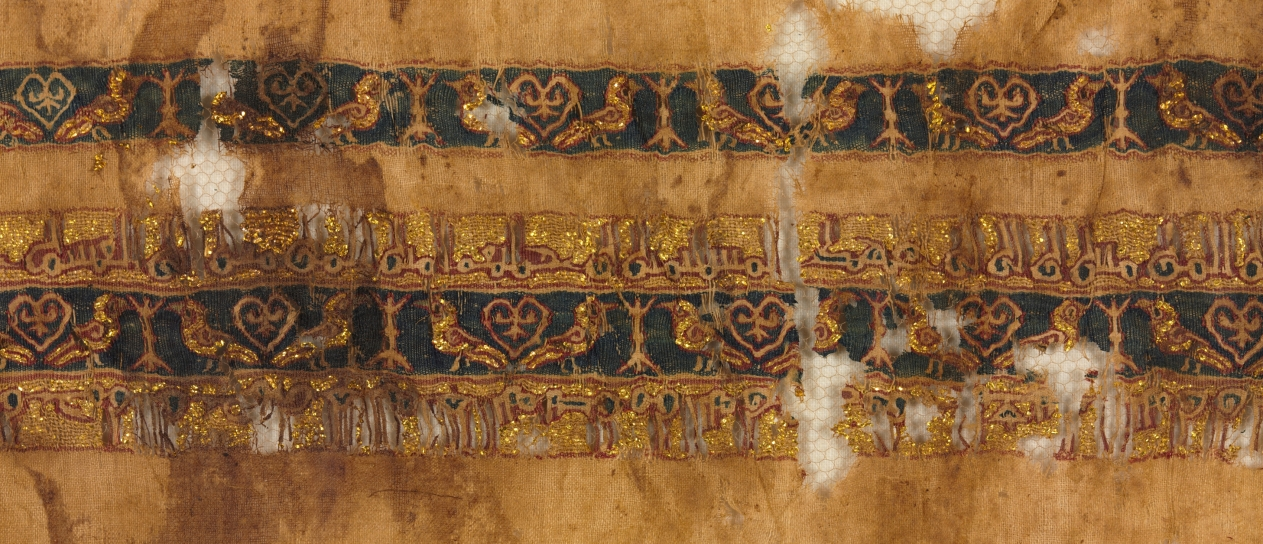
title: Tiraz with gold, probably from a wide sleeve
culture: Egypt, Fatimid period, reign of Caliph al-Hakim, 1013–20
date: 1013–1020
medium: plain weave with inwoven tapestry weave: linen, silk, and gold filé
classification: Textile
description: This textile with expensive gold foil is among the rarest surviving examples among thousands of medieval textiles with historic or generic inscriptions in Arabic, known as tiraz. Tiraz were "emblems of dignity," the prerogative of sovereigns and those they wished to honor. This inscription is masterful. The tall letters are woven with silk thread on only two warps in slit-tapestry weave while the ground was woven with pure gold foil wrapped around a silk core that was not beaten in—to show off its brilliance. The text begins with a prayer and provides the name of Imam al-Hakim, but lacks the place and date of manufacture. The decorative bands feature brilliant gold birds facing simplified trees alternating with popular palmette-decorated hearts. This tiraz fragment may have been part of a wide sleeve that functioned as a receptacle because clothing didn’t have pockets.